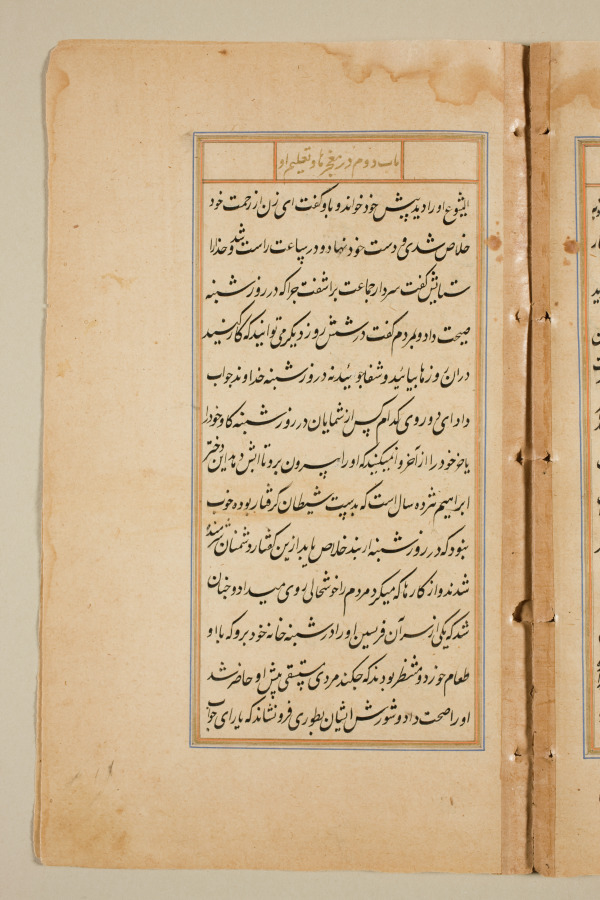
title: Text page from a Mirror of Holiness (Mir’at al-quds) of Father Jerome Xavier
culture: Mughal India, Allahabad, made for Prince Salim (1569–1627)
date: 1602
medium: Ink and gold on paper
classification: Manuscript